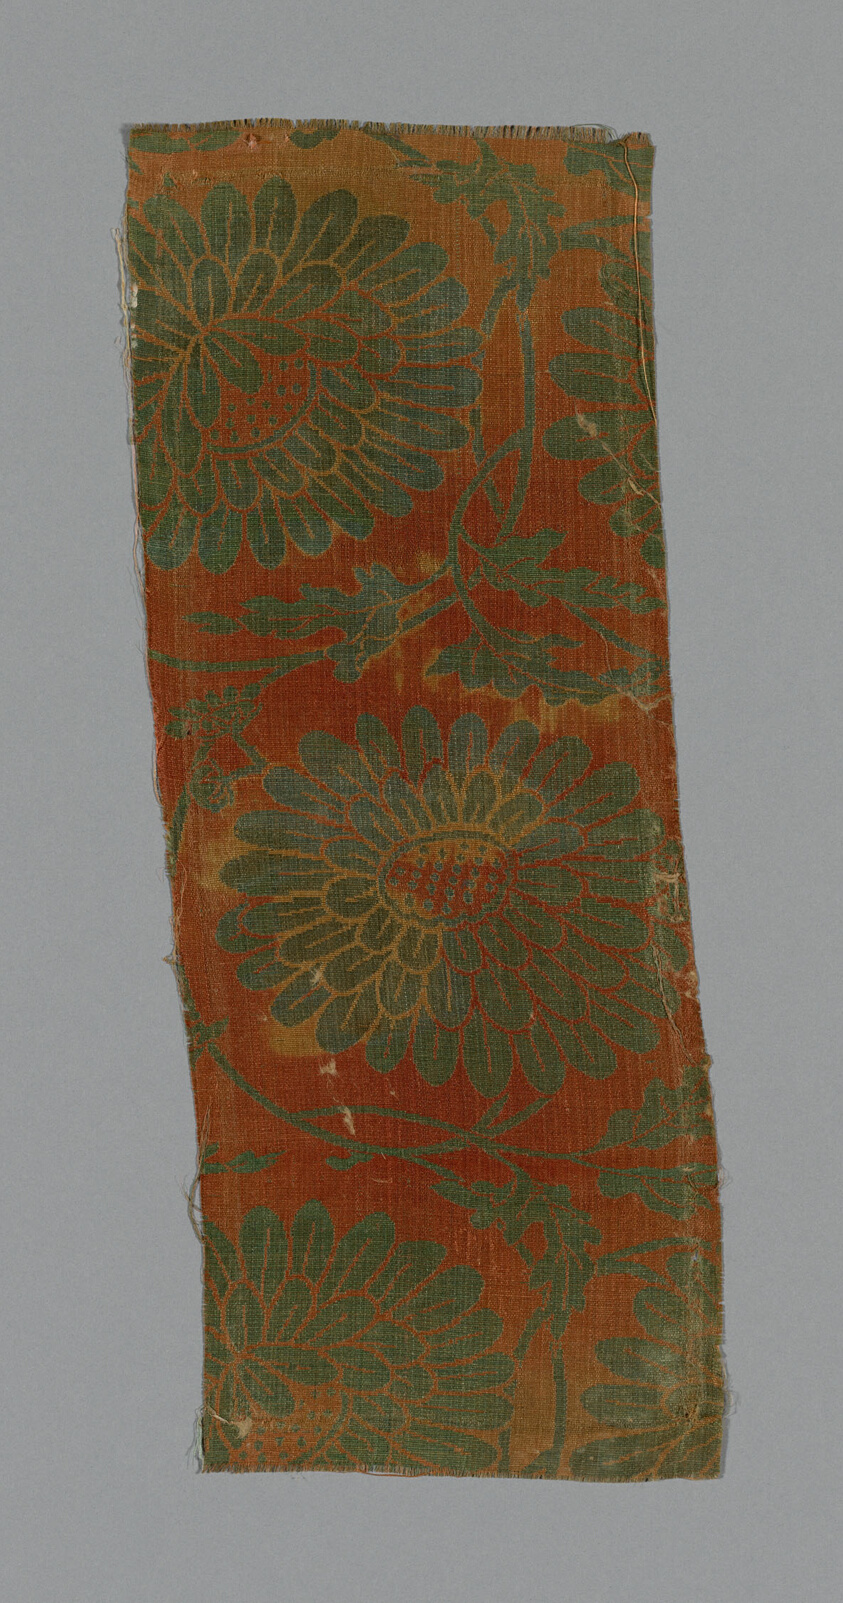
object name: Textile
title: Sutra Cover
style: ming, Chinese (culture or style), East Asian, asian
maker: China, Ming dynasty (1368-1644)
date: Ming dynasty (1368–1644), c. 1590's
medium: Silk, plain weave, double cloth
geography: China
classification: textile; weaving